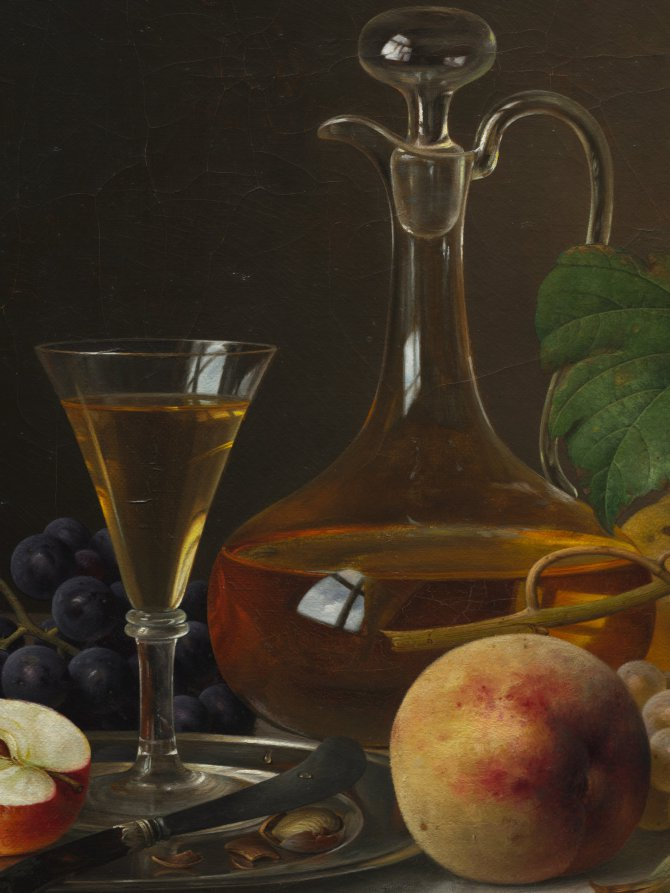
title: Still Life with Fruit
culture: Germany, 19th century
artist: Emilie Preyer (German, 1849–1930)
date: 1873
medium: oil on fabric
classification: Painting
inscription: Signed lower right corner: Emilie Preijer 1873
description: This composition contains many elements that show Preyer's technical abilities. She convincingly rendered the various textures juxtaposed in this composition, such as the contrast between the white cloth and the polished marble table, and the reflecting surfaces of metal, water drops, and glass versus the delicate skin of peaches and grapes. The knife that appears to project out over the side of the table is an indicator of Preyer's familiarity with the tradition of Dutch still-life painting. After early training with her father, Johann Wilhelm Preyer (1803-1889), Emilie Preyer painted her first still life in 1867. For study purposes, she visited museums in Dresden, Antwerp, and the Netherlands. She focused primarily on still lifes of fruit.